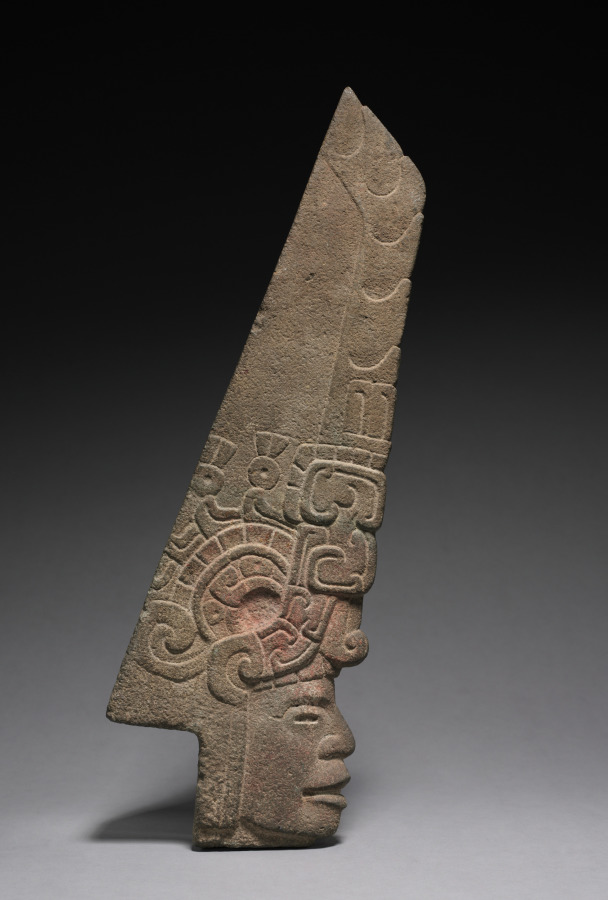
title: Ballgame Thin Stone Head (Hacha)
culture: Mexico, Gulf Coast, Classic Veracruz style (600-1100)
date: 600–900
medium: stone, pigment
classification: Sculpture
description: A tapering headdress, its base formed by a grotesque head with upturned snout, soars above a human face in this elegant thin stone head. Such heads, known as hachas, probably were used in ballgame ceremonies, though how is unclear. Equally obscure are the heads’ identities, perhaps heroic, idealized players, ballgame patrons, or characters from the game’s lore. The large area of red pigment on one side may have been sprinkled onto the head after it was buried in an offering or a tomb.